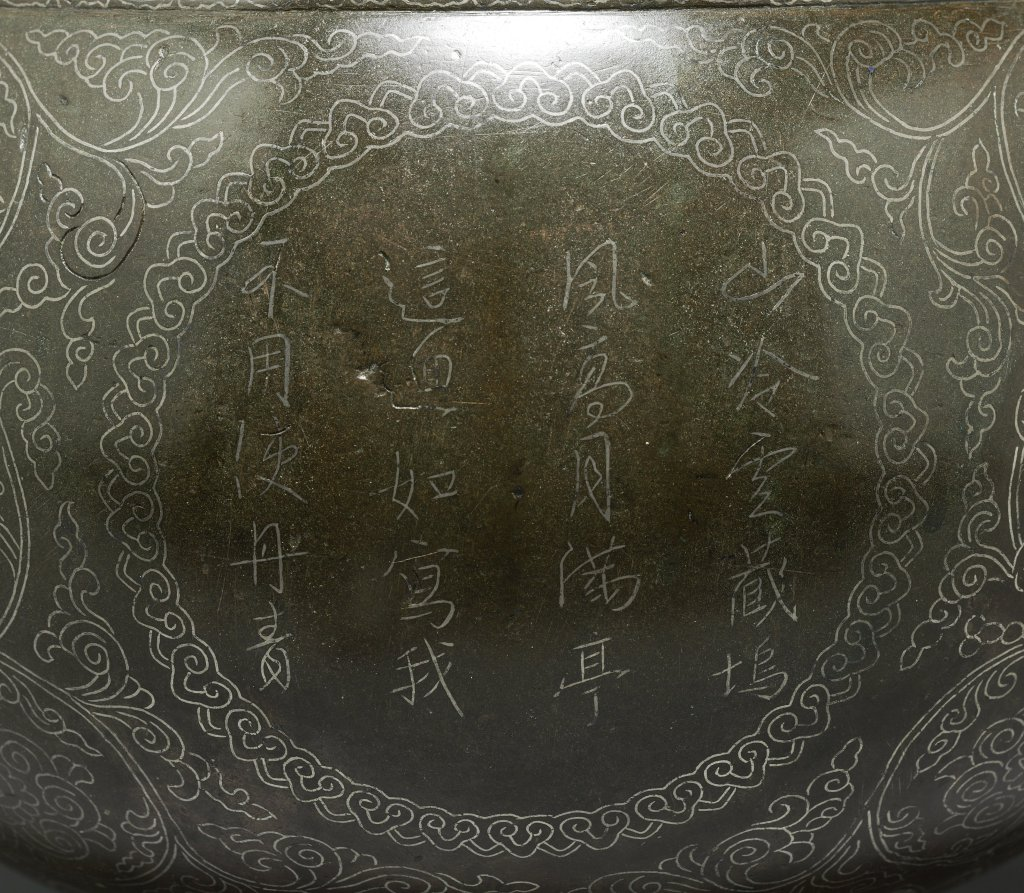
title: Basin with Inscribed Figures and Calligraphy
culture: Korea, Goryeo dynasty (918–1392)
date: 1100s–1200s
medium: bronze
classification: Metalwork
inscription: Each of the three roundels contain five-character, four-line poems with Buddhist messages.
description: This bronze basin may have been used for containing purified water. What makes this work charming is its intricate decoration done in silver inlay: the five-character, four-line poems interspersed among images of a child. The poems, which evoke the concept of nonattachment and nonduality, were written by Buddhist monks.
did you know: A child, one of the main decorative elements for this basin, is possibly a young Buddhist pilgrim named Sudhana, who took a long spiritual journey to search for enlightenment.